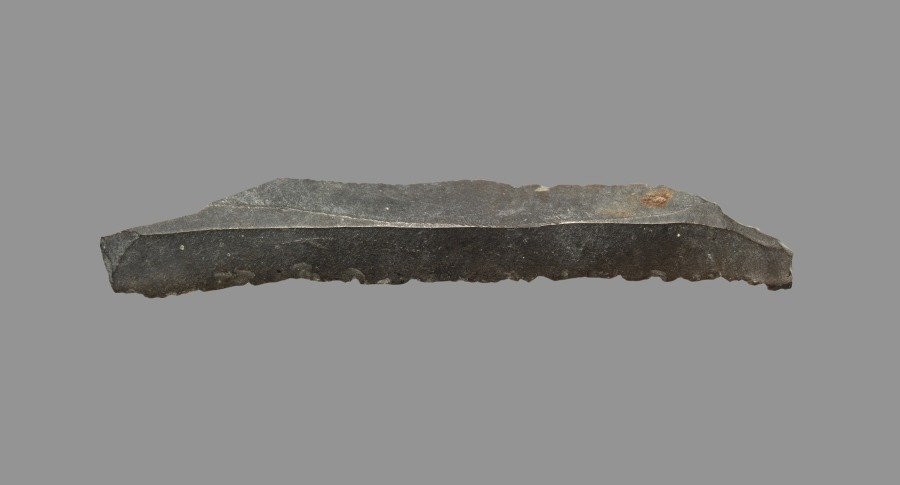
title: Sickle Blades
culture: Egypt, Middle Kingdom (2040–1648 BCE), Dynasty 12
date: 1980–1801 BCE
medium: flint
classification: Implements